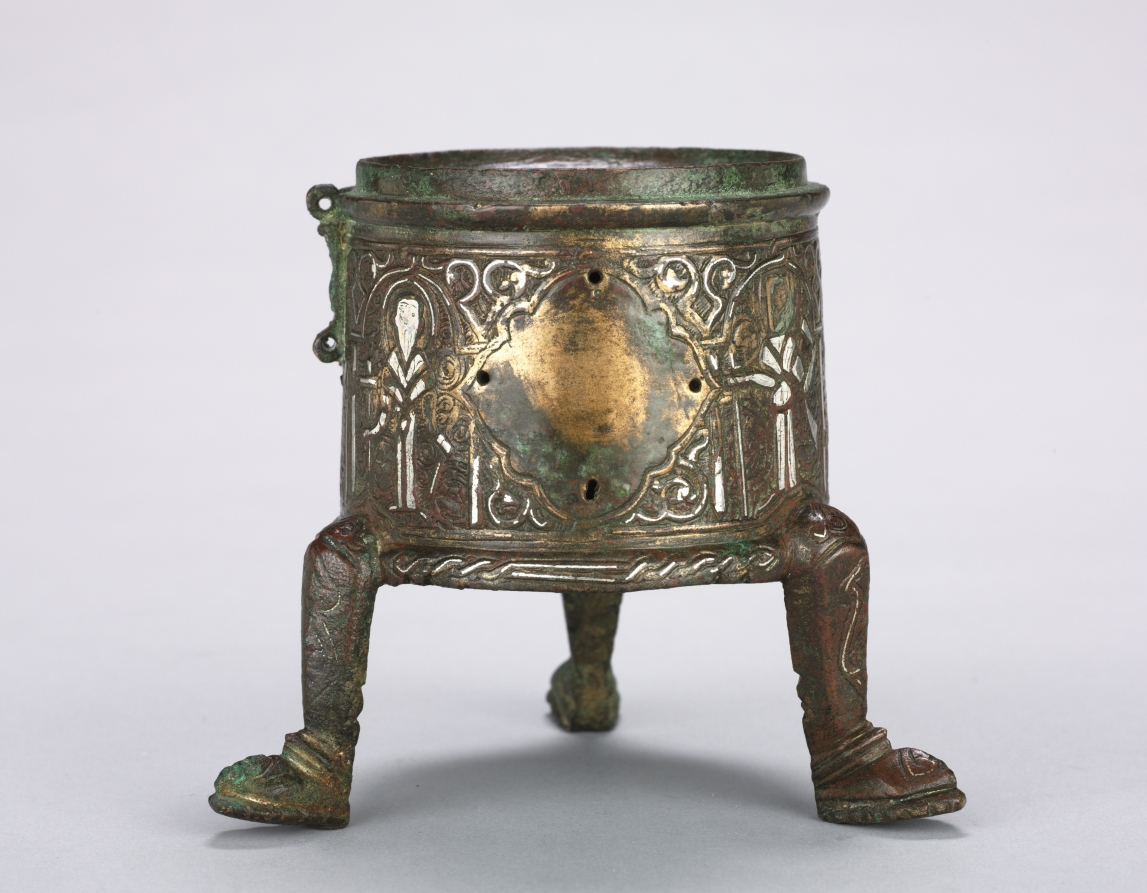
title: Incense Burner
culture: Syria, Ayyubid Period, 13th Century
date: 1200–1250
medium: brass inlaid with silver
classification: Metalwork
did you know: This footed vessel is wearing shoes.